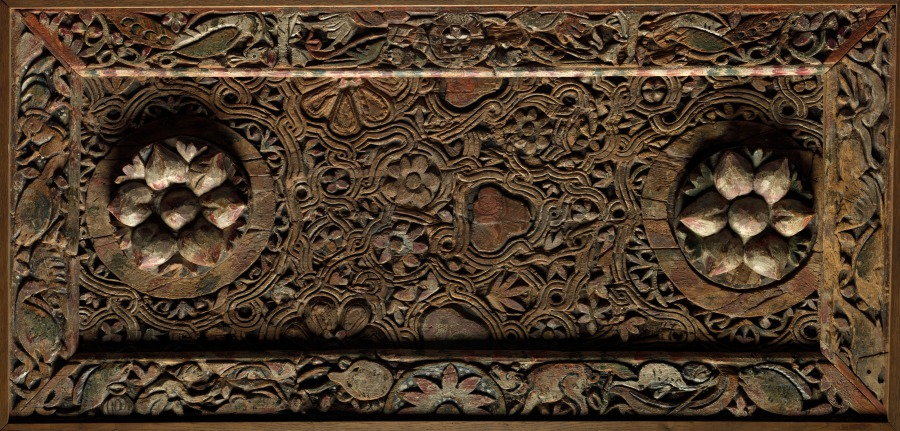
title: Ornamental Panel (from a Ceiling?)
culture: Egypt, Coptic period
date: 500s (frame) and 700s (central panel)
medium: wood with paint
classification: Furniture and woodwork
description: This wooden panel and its frame come from different locations. The four narrow panels forming the outer frame are stylistically datable to the 500s. The large central rectangular panel might date to the 700s. It is most likely a carved ceiling, but its architectural context is unknown. Both panel and frame have been cut down and joined together at some point in their history under unknown circumstances. The decorative program of the main panel features two large rosettes surrounded by florets, leaves, and fruit. The outer frame features two flying angels holding a wreath, a peacock, an octopus, a seated fisherman who holds a long line with a fish attached, and a swimming boy with a dolphin. The vocabulary of the frame is dominated by water life, particularly of the Nile and its banks. Though separated from its original place and altered, this important object provides a welcome glimpse of an architectural interior from early Christian Egypt.